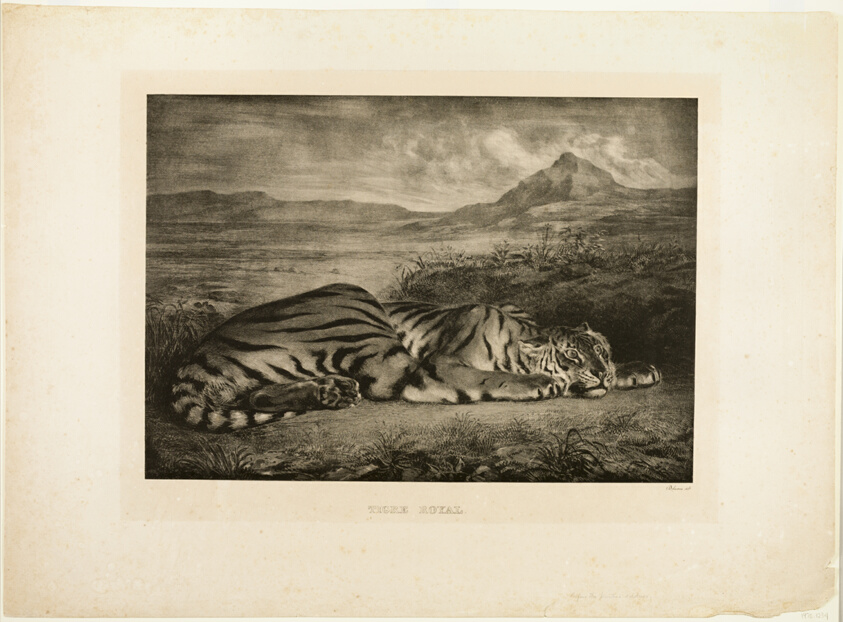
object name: Print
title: Bengal Tiger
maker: Eugène Delacroix (French, 1798-1863)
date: 1829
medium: Lithograph in black on buff wove paper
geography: France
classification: lithograph; print; prints and drawing